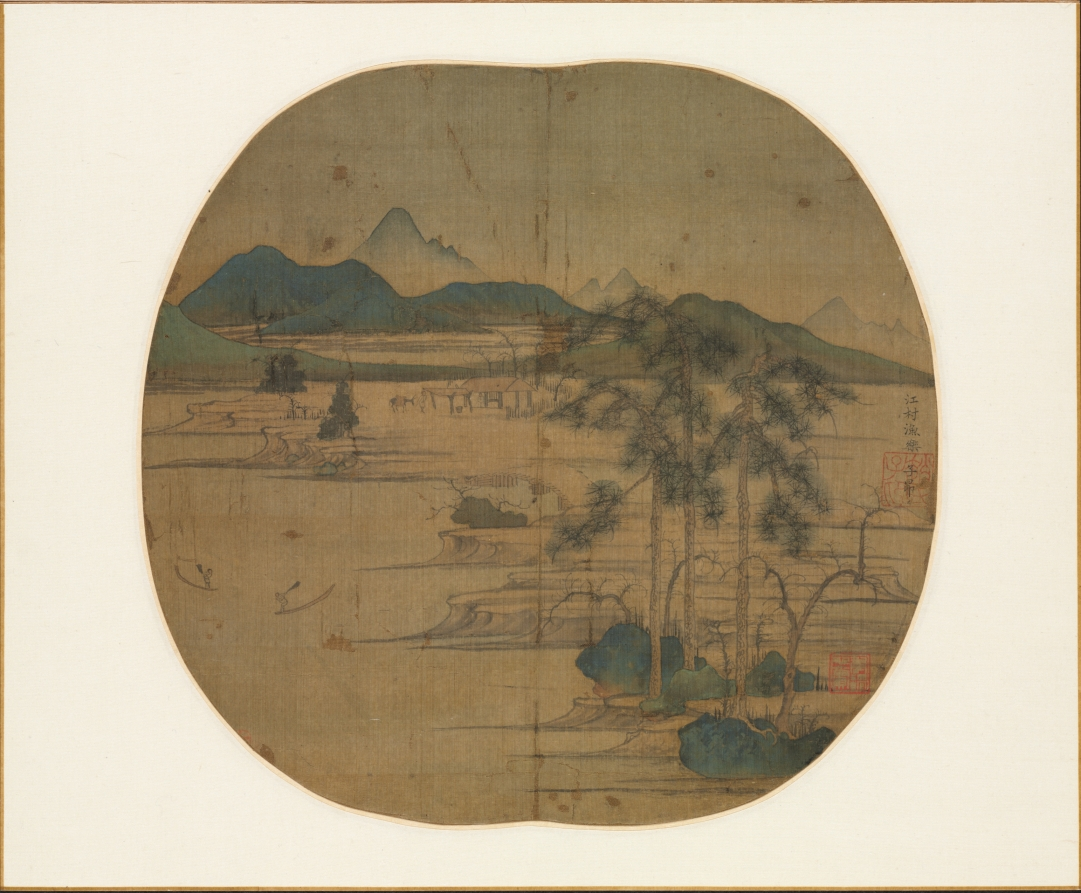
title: River Village: Fisherman's Joy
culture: China, Yuan dynasty (1271-1368)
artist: Zhao Mengfu (Chinese, 1254–1322)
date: c. 1302–3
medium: Fan painting mounted as album leaf; ink and color on silk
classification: Painting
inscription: 江村漁樂 子昂。 [印] 趙氏子昂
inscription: 1 colophon and 2 additional seals: 1 colophon, unsigned; 2 seals of C. C. Wang 王季遷 (1907–2003).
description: The artist of this blue-green–style landscape, Zhao Mengfu, was a southerner, versed in all fields of literati pursuits, such as calligraphy and connoisseurship. A princeling of the defeated Southern Song dynasty, he was nevertheless successfully recruited by Khubilai Khan to the Mongol court in the new capital, Dadu (modern Beijing), in 1286. This painting combines a distinctively southern flat watery landscape combined with features of the northern landscape tradition, notably the spiky trees, branches, and rough-surfaced rocks.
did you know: Various human elements can be found in the painting: two fishermen, an individual with a donkey, and someone in the house.